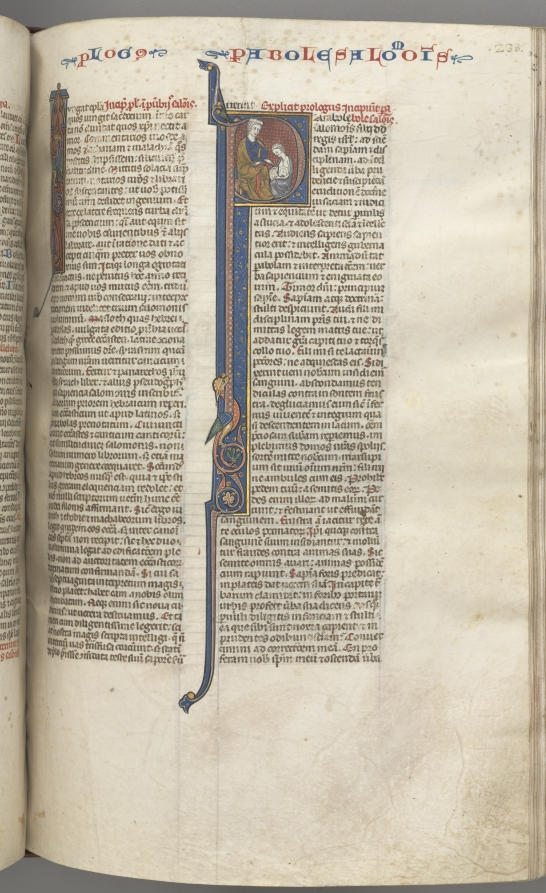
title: Fol. 238r, Proverbs, historiated initial P, Solomon instructing Rehoboam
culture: Southern France, Toulouse(?), 13th century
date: c. 1275–1300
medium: ink, tempera and gold on vellum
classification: Bound Volume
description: Biblical manuscripts were highly prized and important possessions of churches, monasteries, cathedral schools, and universities throughout medieval Europe. The biblical texts were known as the vulgate, the translations made by Saint Jerome in the fourth century from Hebrew and Greek into Latin, which became the definitive and official Latin version of the Roman Church. In the 13th century, the bible was, for the first time, produced as a single volume with an officially sanctioned sequence to its books and chapters as illustrated by this example. The very extensive decoration of this bible is arranged hierarchically to indicate the relative importance of the various texts so that full or almost full-page initials mark the openings of the first prologue, Genesis, and the first Gospel; historiated initials mark the beginning of each book and illuminated initials mark the Prologues.